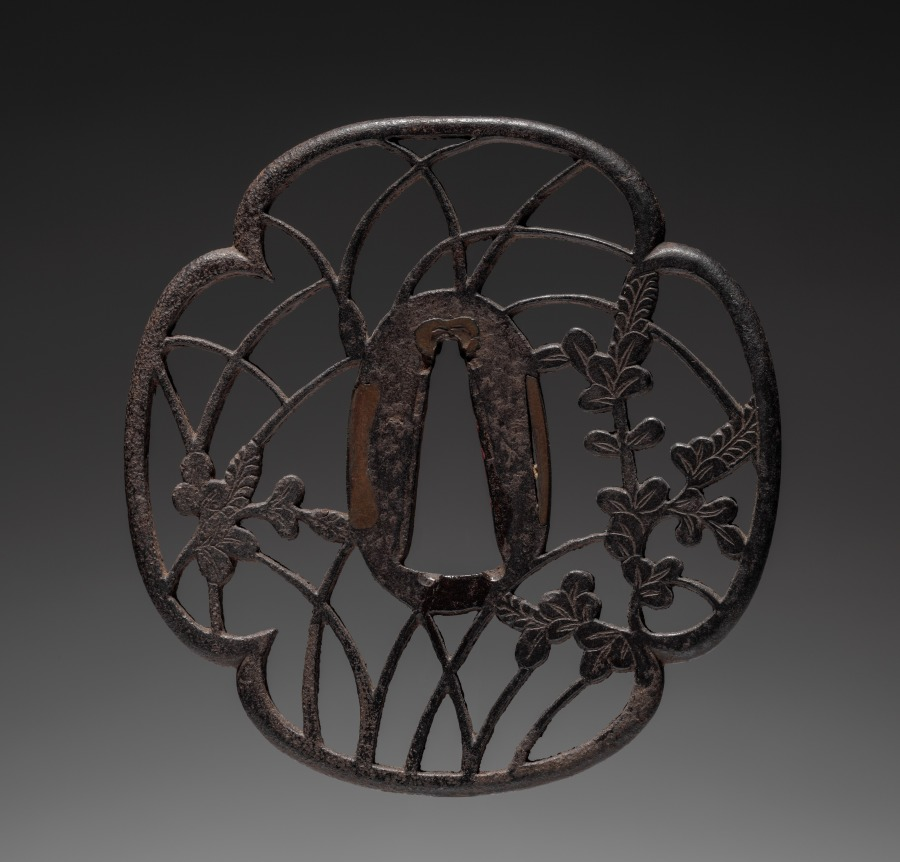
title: Sword Guard (Tsuba)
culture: Japan, possibly Edo period (1615-1868)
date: c. 1615–1868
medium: iron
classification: Arms and Armor